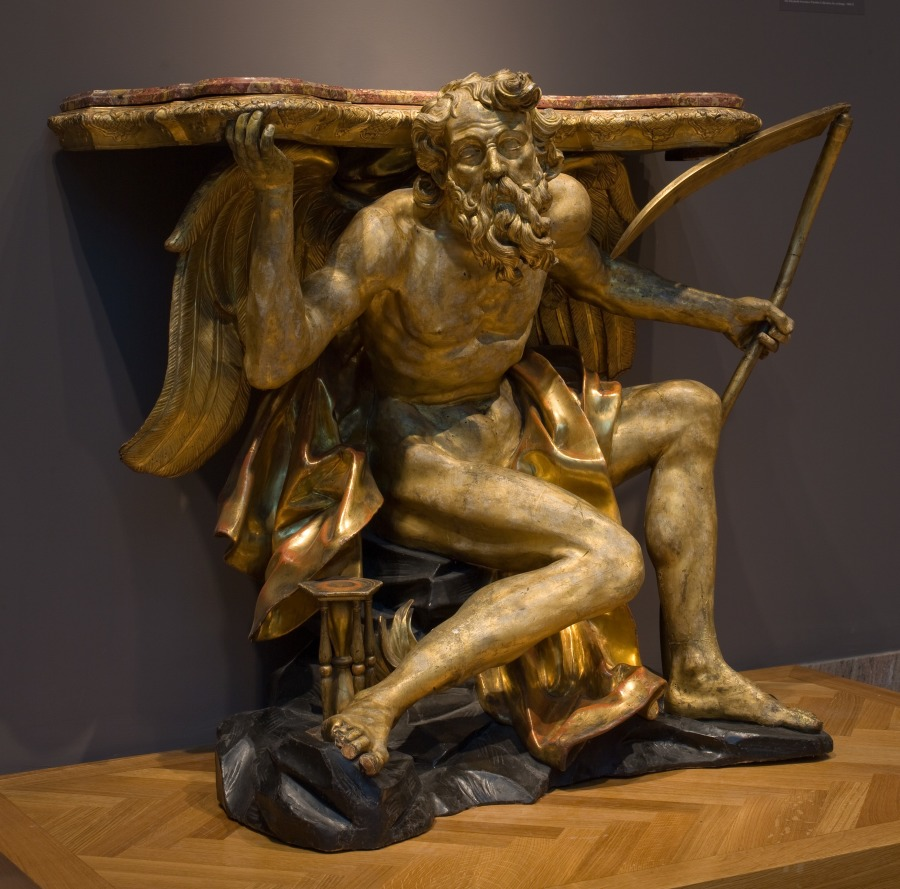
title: Console Table Depicting Chronos, or Father Time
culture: Italy, probably Rome, late 17th-early 18th Century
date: c. 1700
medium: painted and gilded wood, marble top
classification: Furniture and woodwork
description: The marble tabletop is supported by a gilded wooden figure of Father Time (or “Chronos”) adorned with his typical attributes of wings, a scythe, and an hourglass. The metaphorical weight of his eternal role is emphasized as he bears the heavy stone slab on his shoulders while reaching up to ensure its balance.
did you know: Father Time’s scythe symbolizes natural cycles, like the harvest, and time's unstoppable flow that cuts down all living things.